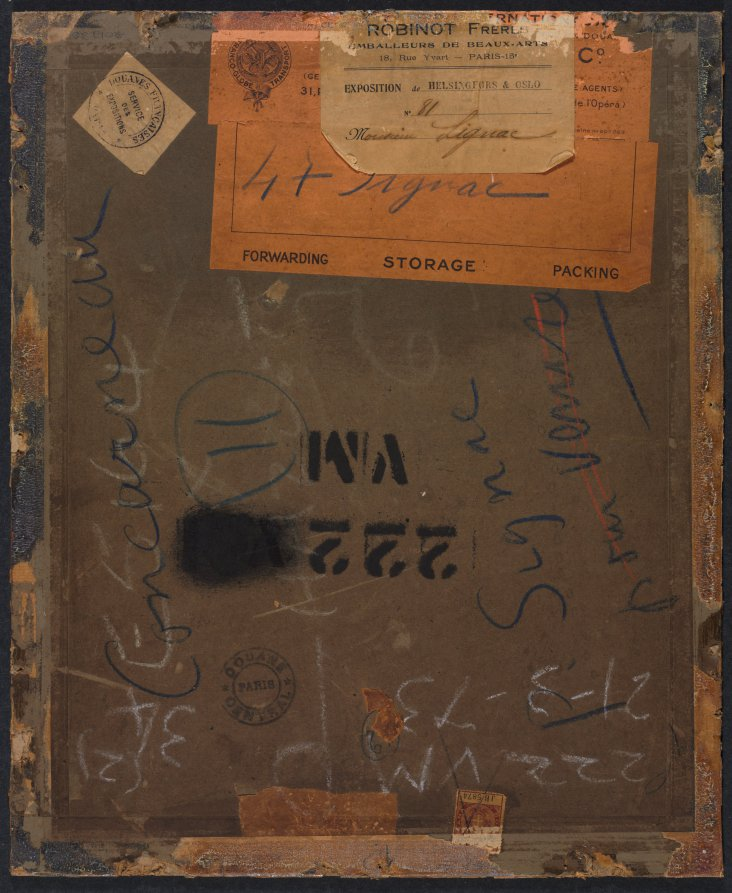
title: Boat in Port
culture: France, 20th century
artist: Paul Signac (French, 1863–1935)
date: c. 1929–1931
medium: watercolor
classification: Drawing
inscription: Inscribed, lower right, in black ink (?): Signac